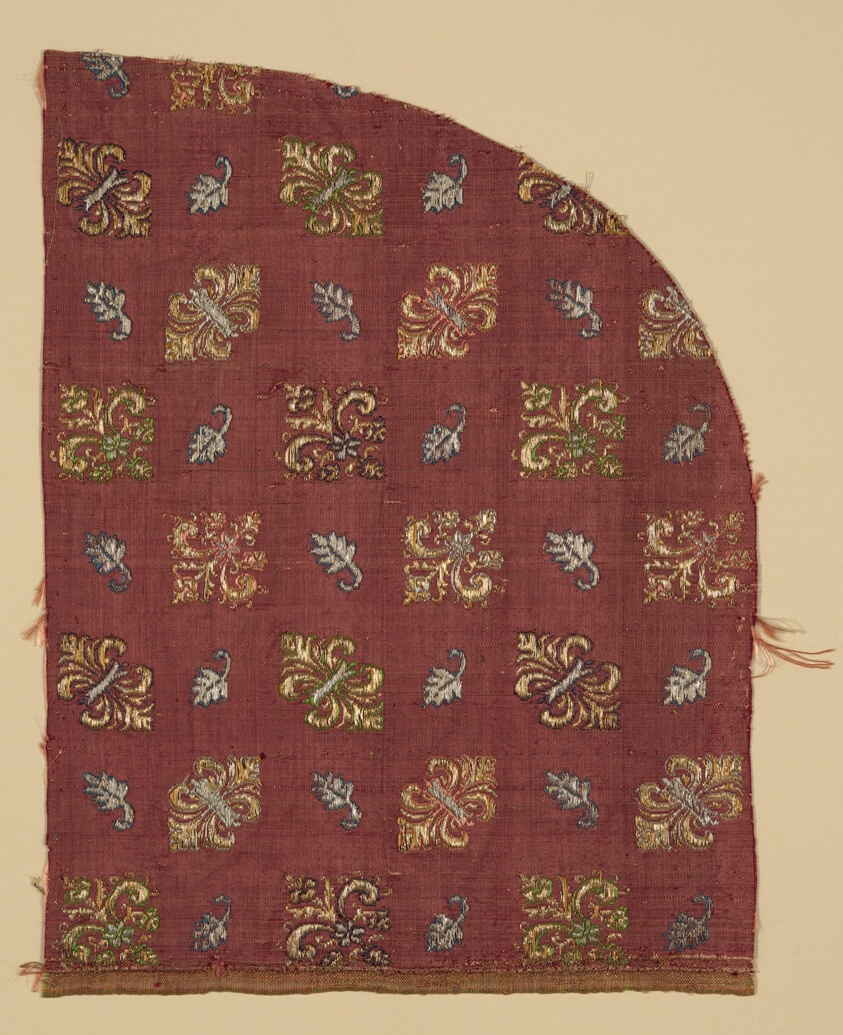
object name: Textile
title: Fragment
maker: Italy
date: Mid–17th century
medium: Silk, gold, and silver gilt strips wound around silk fiber core, plain weave with supplementary brocading wefts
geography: Italy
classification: textile; weaving